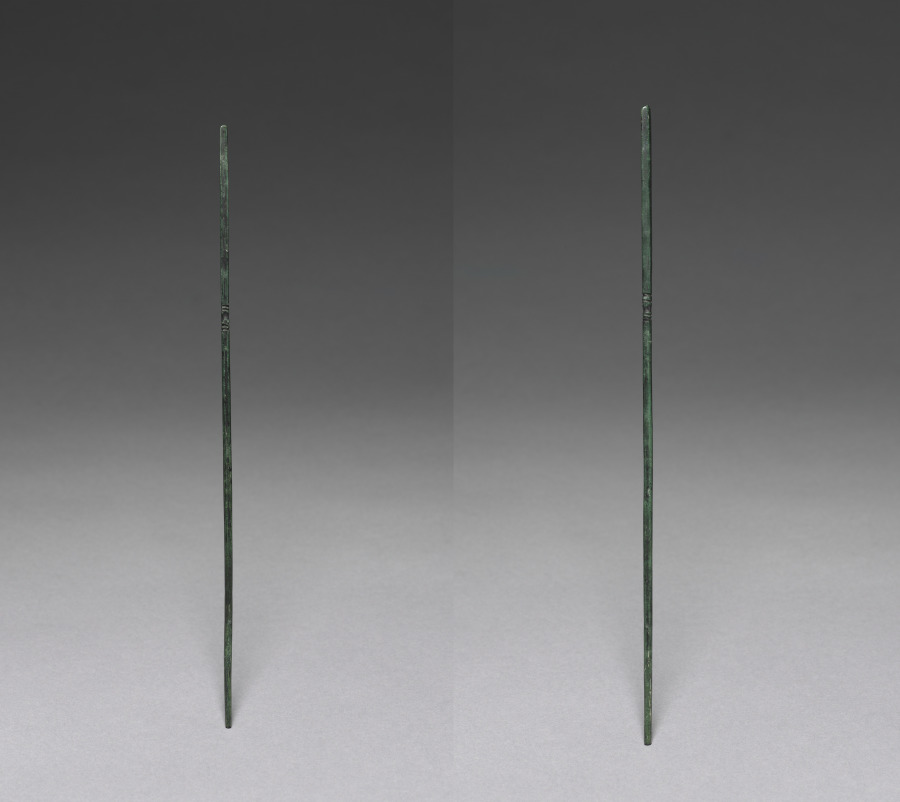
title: A Pair of Chopsticks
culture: Korea, Goryeo dynasty (918–1392)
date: 918–1392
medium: bronze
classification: Metalwork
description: In Korea, chopsticks made of metal such as brass, silver, and gold were excavated from ancient tombs and ruins dated to the 6th century at the earliest. Burial goods often include utilitarian objects such as table wares and utensils because the dead were believed to need them in the afterlife.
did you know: In contrast to the Chinese and Japanese, Koreans still prefer metal chopsticks (stainless steel and brass) to wooden ones.